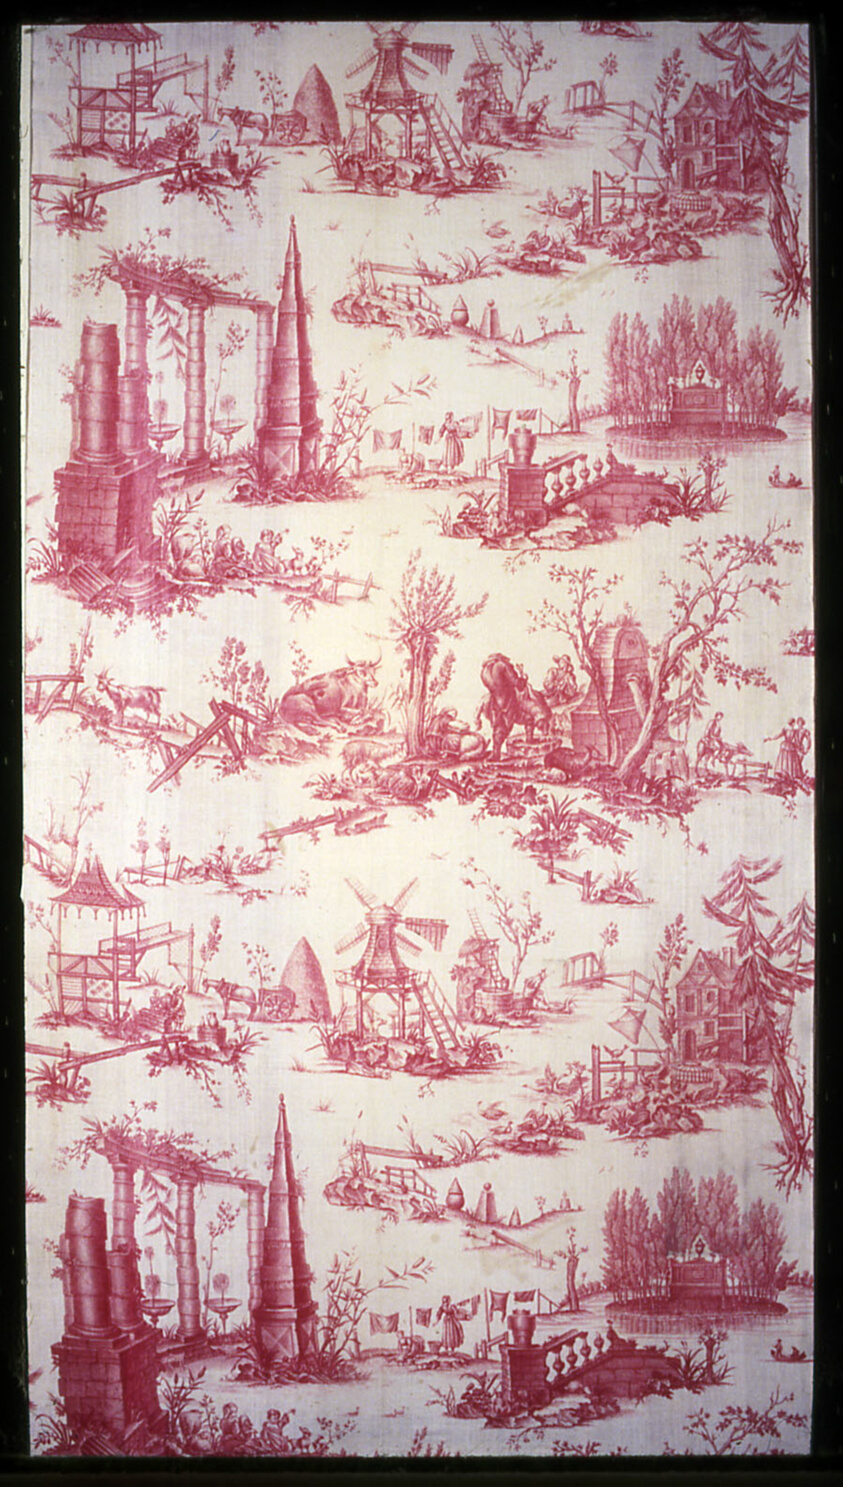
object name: Textile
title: Le Tombeau de Jean Jacques Rousseau (The Tomb of Jean Jacques Rousseau) (Furnishing Fabric)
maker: Designed by Jean Baptiste Huet (French, 1745–1811) after Jean Michel Moreau, the Younger (French, 1741–1814); Manufactured by Gorgerat Frères et Cie (French, 1783, 1815); France, Nantes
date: after 1778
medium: Cotton, plain weave; copperplate printed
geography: Nantes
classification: textile; weaving - printed; furnishing textile